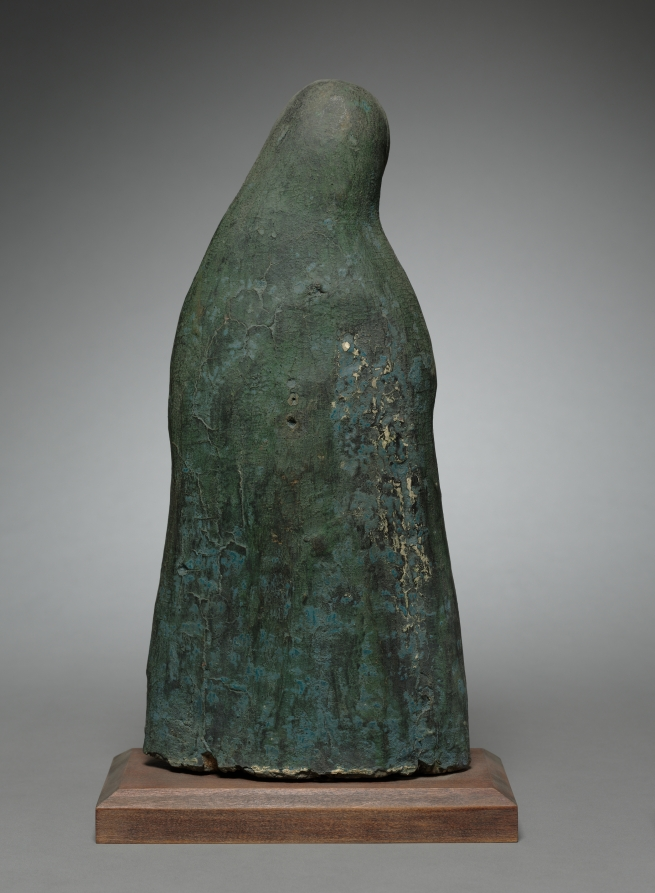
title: Our Lady of Sorrows: santo de bulto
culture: America, New Mexico, 17th-18th century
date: 1600s-1700s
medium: painted wood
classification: Sculpture